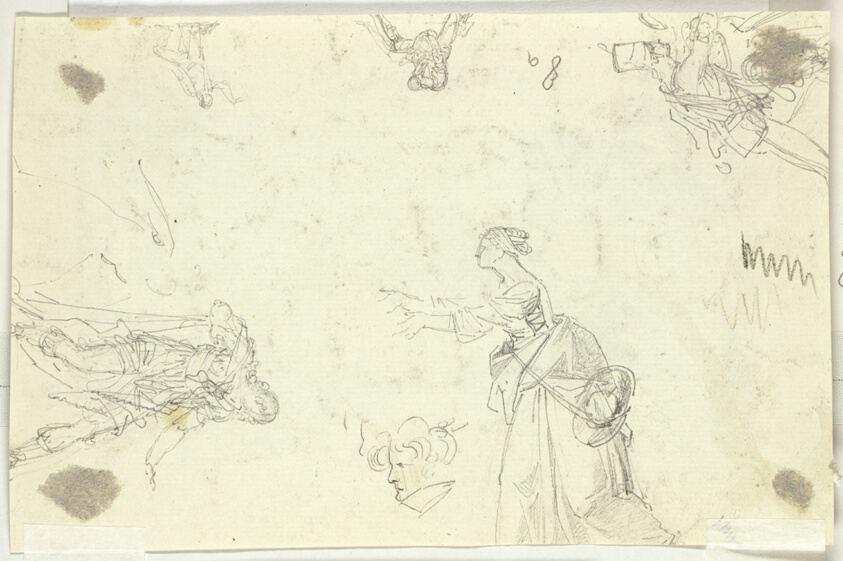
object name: Drawing and Watercolor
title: Sheet of Sketches: Men and Women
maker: Pierre Antoine Mongin (French, 1761-1827)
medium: Graphite, with traces of black and red chalk, on cream laid paper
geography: France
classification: drawings (visual works); prints and drawing